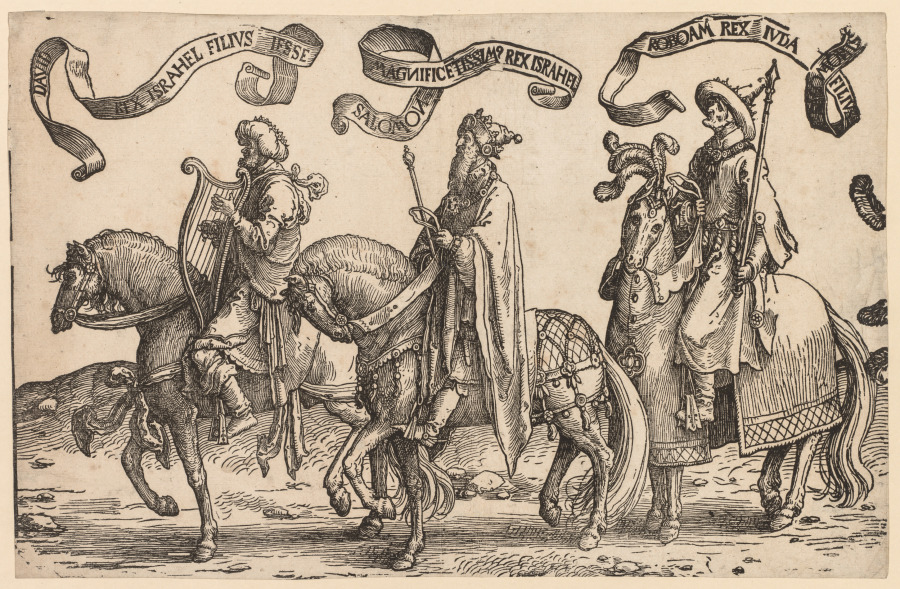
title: The Twelve Kings of Israel: David, Solomon, Rehoboam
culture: Netherlands, 16th century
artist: Lucas van Leyden (Netherlandish, 1494–about 1533)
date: 1515–1517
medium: woodcut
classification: Print